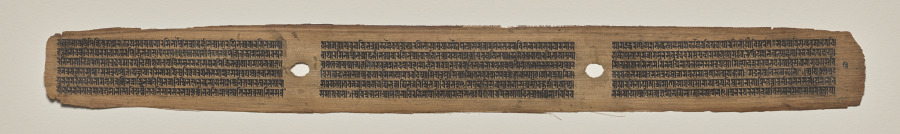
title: Text, folio 3 (recto), from a Manuscript of the Perfection of Wisdom in Eight Thousand Lines (Ashtasahasrika Prajnaparamita-sutra)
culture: Eastern India, Bihar, Vikramashila Monastery. Painting: Nepal, Kathmandu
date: Sunday, September 14, 1119 (year 239 of the Newar Samvat in the month of Ashvina)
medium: ink and color on palm leaf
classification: Painting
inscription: śyamāne bodhisattvasya mahāsuttrasā cittaṃ nāvalīyate na saṃlīyate na viṣīdati na viṣādamāpadyate, nāsya vipṛṣṭhībhavati mānasam, na bhagnapṛṣṭhībhavati, notrasyati na saṃtrasyati na saṃtrāsamāpadyate, eṣa eva bodhisattvo mahāsattvaḥ prajñāpāramitāyāmanuśāsanīyaḥ / eṣaivāsya bodhisattvasya mahāsattvasya prajñāpāramitā veditavyā / eṣo 'vavādaḥ prajñāpāramitāyām / sacedevaṃ tiṣṭhati, eṣaivāsyāvavādānuśāsanī // punaraparaṃ bhagavan bodhisattvena mahāsattvena prajñāpāramitāyāṃ caratā prajñāpāramitāyāṃ bhāvayatā evaṃ śikṣitavyaṃ yathā asau śikṣyamāṇastenāpi bodhicittena na manyeta / tatkasya hetoḥ? tathā hi - taccittamacittam / prakṛtiścittasya prabhāsvarā // atha khalvāyuṣmān śāriputra āyuṣmantaṃ subhūtimetadavocat - kiṃ punarāyuṣman subhūte asti taccittaṃ yaccittamacittam? evamukte āyuṣmān subhūtirāyuṣmantaṃ śāriputrametadavocat kiṃ punarāyuṣman śāriputra yā acittatā, tatra acittatāyāmastitā vā nāstitā vā vidyate vā upalabhyate vā? śāriputra āha - na hyetadāyuṣman subhūte / subhūtirāha - sacedāyuṣman śāriputra tatra acittatāyāmastitā vā nāstitā vā na vidyate vā nopalabhyate vā, api nu te yukta eṣa paryanuyogo bhavati yadāyuṣmān śāriputra evamāha - asti taccittaṃ yaccittamacittamiti? evamukte āyuṣmān śāriputra āyuṣmantaṃ subhūtimetadavocat - kā punareṣā āyuṣman subhūte acittatā? subhūtirāha - avikārā āyuṣman śāriputra avikalpā acittatā // atha khalvāyuṣmān śāriputra āyuṣmate subhūtaye sādhukāramadāt - sādhu sādhvāyuṣman subhūte / yathāpi nāma tvaṃ bhagavatā araṇāvihāriṇāmagratāyāṃ nirdiṣṭo nirdiśasi / ataś ca bodhisattvo mahāsattvo 'vinivartanīyo 'nuttarāyāḥ samyaksaṃbodherupaparīkṣitavyaḥ, avirahitaś ca bodhisattvo mahāsattvaḥ prajñāpāramitāyā veditavyaḥ / śrāvakabhūmāv api śikṣitukāmena iyameva (vaidya 4) prajñāpāramitā śrotavyā udgrahītavyā dhārayitavyā vācayitavyā paryavāptavyā pravartayitavyā / ihaiva prajñāpāramitāyāṃ śikṣitavyaṃ yogamāpattavyam / pratyekabuddhabhūmāv api śikṣitukāmena iyameva prajñāpāramitā śrotavyā udgrahītavyā dhārayitavyā vācayitavyā paryavāptavyā pravartayitavyā / ihaiva prajñāpāramitāyāṃ śikṣitavyaṃ yogamāpattavyam /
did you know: The Sanskrit text is written in a continuous script known as ranjana.